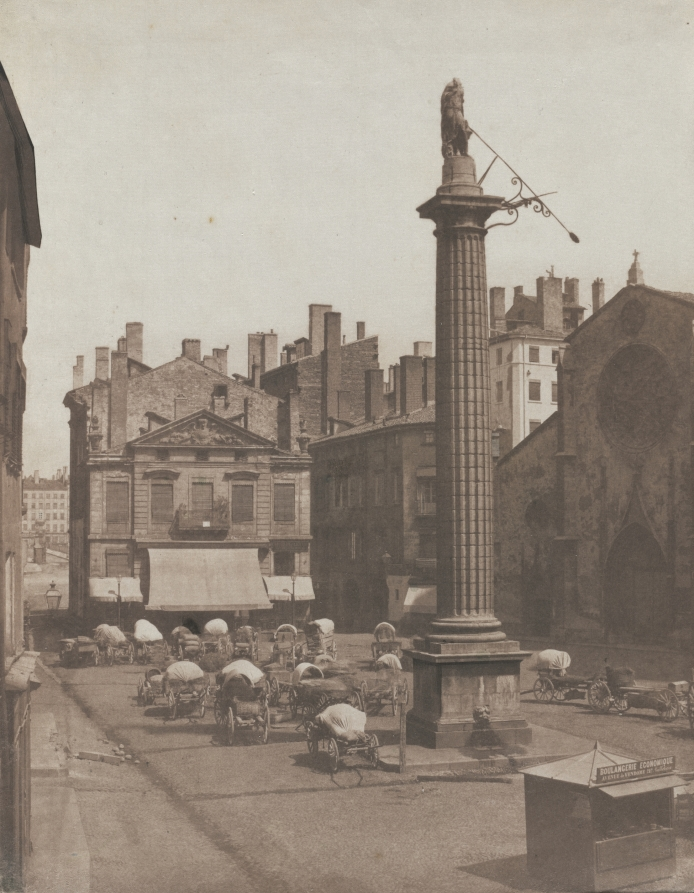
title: Untitled (Place des Cordeliers)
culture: France, 19th century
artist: Louis-Antoine Froissart (French, 1815–1860)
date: c. 1852–1853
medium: salted paper print from a waxed paper negative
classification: Photograph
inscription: Written in pencil on verso: "P.18 4/4 5 AS G/early RISD"